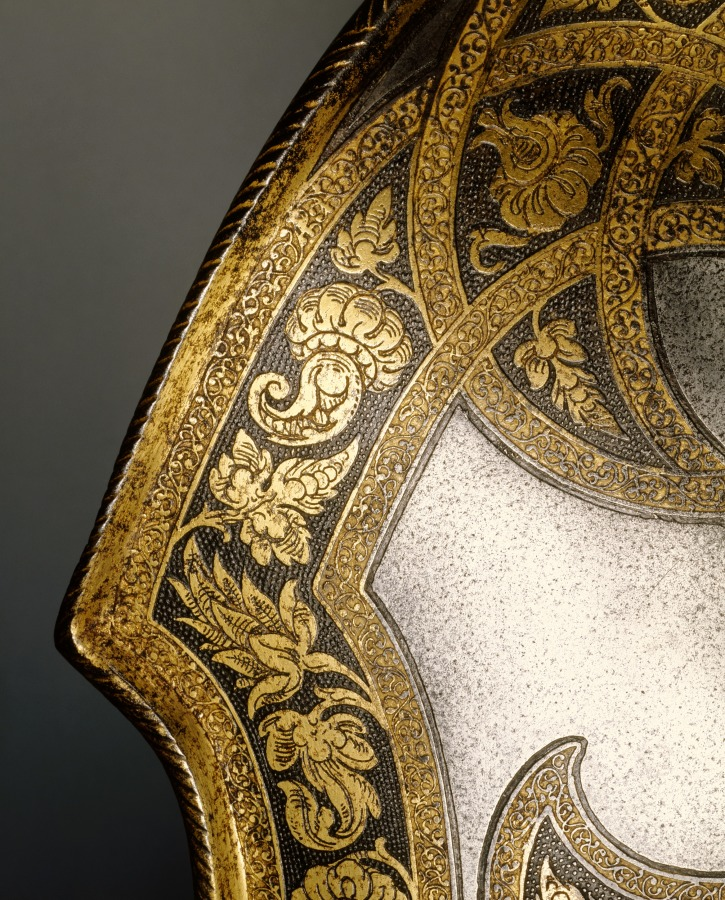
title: Pommel Plates from the Garniture of Rudolf II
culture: Germany, Augsburg, 16th century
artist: Anton Peffenhauser (German, 1525–1603)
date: c. 1571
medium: blued, etched, and gilded steel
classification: Arms and Armor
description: These plates, once part of a saddle, are from a tournament armor for man and horse made for the sons of Emperor Maximilian II, archdukes Rudolf and Ernst. Most of the remaining elements of this armor are still in the collections of the Imperial Armouries in Vienna. The decorative pattern (in the imperial colors of black and gold) forms elegant knots, with distinctive foliage and hop sprigs filling the loops.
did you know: Once part of a saddle, these plates protected the rider's thighs.